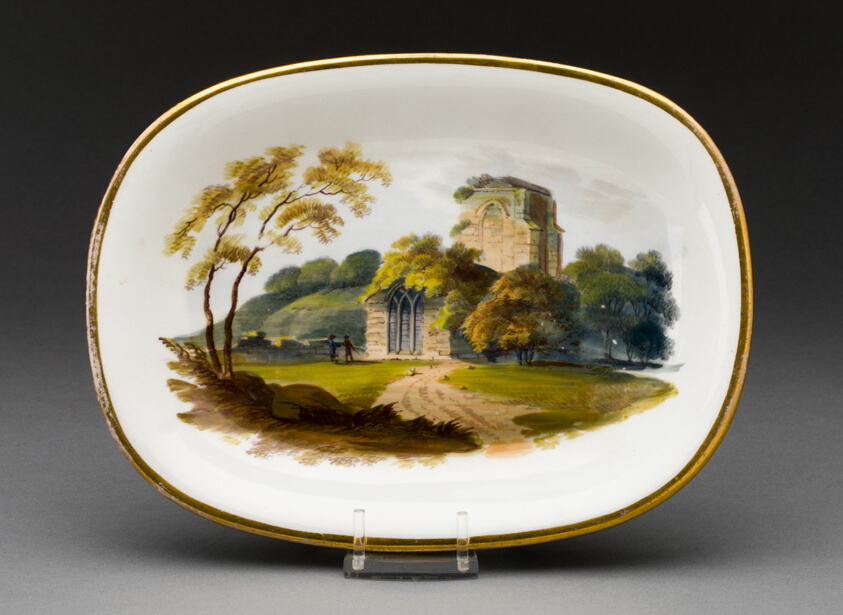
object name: Ceramics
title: Teapot Stand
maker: Wedgwood Manufactory (England, founded 1759)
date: c. 1815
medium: Porcelain with polychrome enamels and gilding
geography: Burslem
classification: teapot; teaware; porcelain; european decorative arts; ceramics